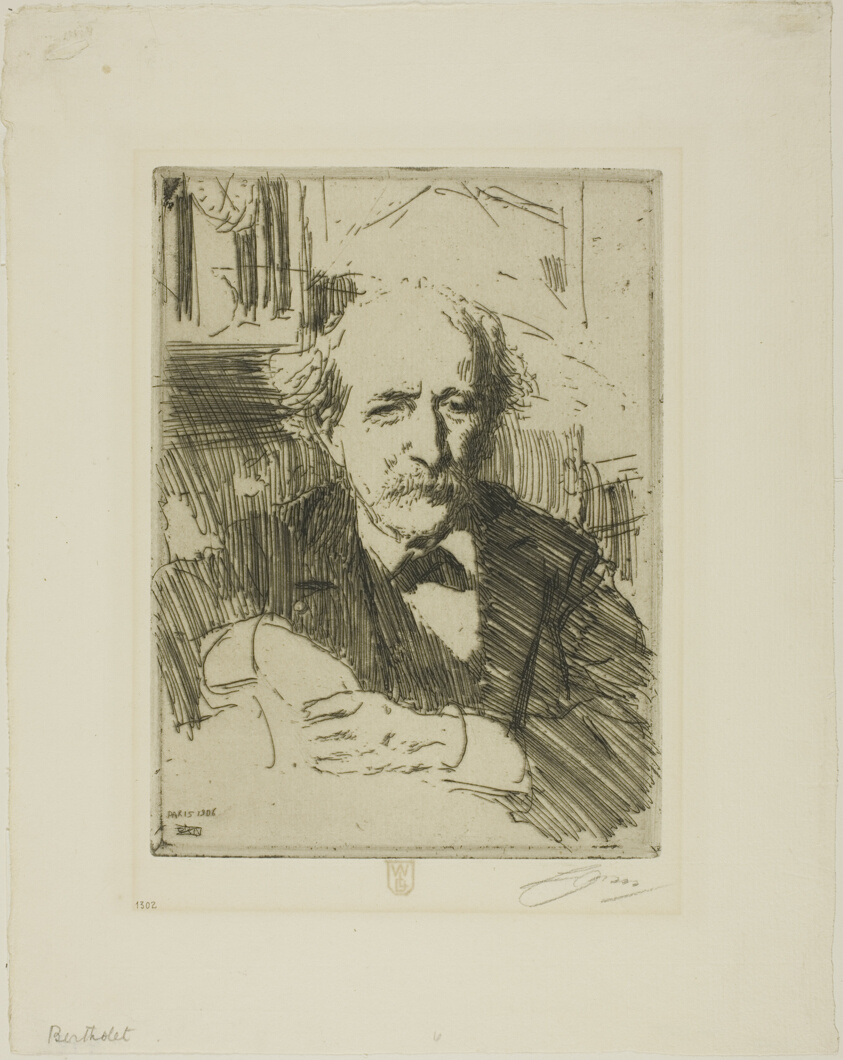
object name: Print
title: Marcellin Berthelot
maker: Anders Zorn (Swedish, 1860-1920)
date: 1906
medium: Etching on ivory laid paper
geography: Sweden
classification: etching; print; prints and drawing